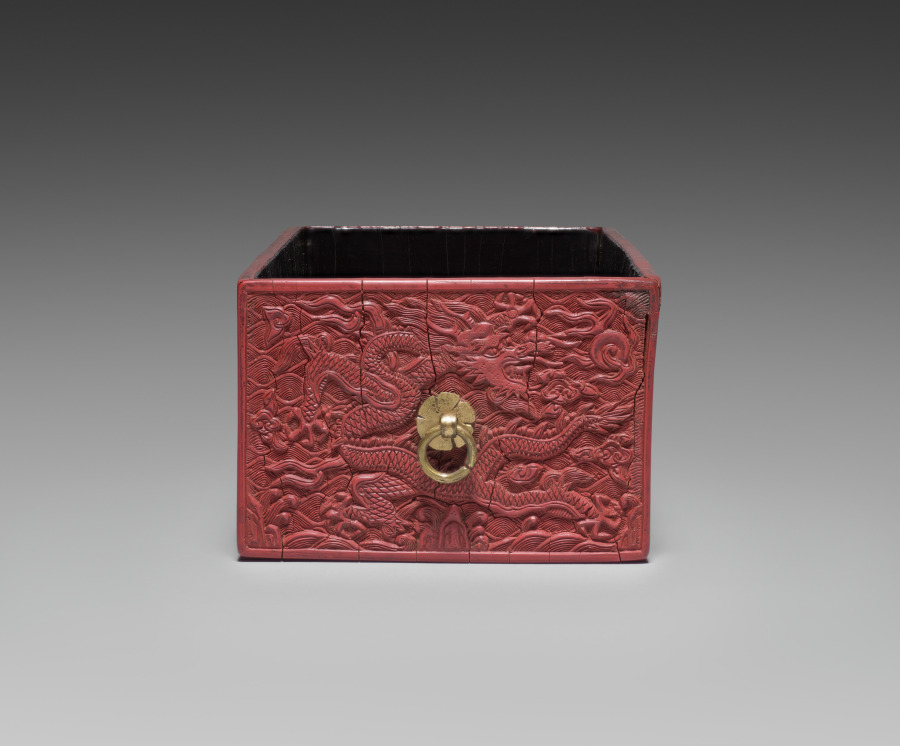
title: Drawer for a Tihong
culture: China, Ming dynasty (1368-1644), Wanli reign (1572-1620)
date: 1585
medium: carved cinnabar lacquer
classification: Lacquer